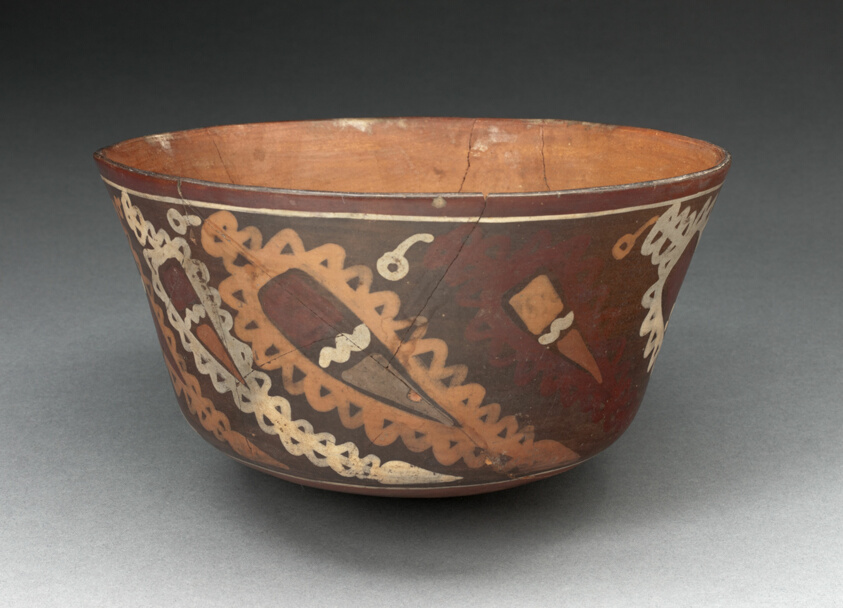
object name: Vessel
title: Miniature Flared Bowl Depicting Abstract Peppers with Decorative Motifs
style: nazca, south american, andes, Arts of the Americas, andean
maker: Nazca; South coast, Peru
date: 180 BCE–500 CE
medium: Ceramic and pigment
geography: Peru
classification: bowl; earthenware; ceramics; vessel; art of the americas